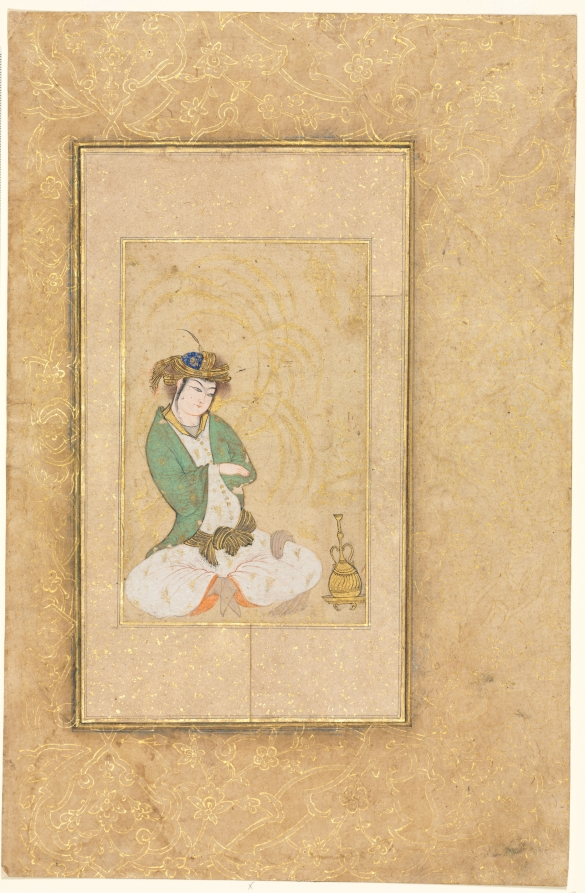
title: Youth Seated by a Willow; Single Page Illustration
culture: Iran, Isfahan, Safavid period (1501-1722)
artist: style of Muhammad Yusuf (Iranian)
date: c. 1600–1650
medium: ink, gold, and colors on paper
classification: Manuscript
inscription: Script: none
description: A new aesthetic developed under the socially and economically conscious Shah ’Abbas I (reigned 1587–1629). Single polychrome paintings of elegantly clad youth were produced in considerable number during the 1600s, primarily for people with means who collected them and had them mounted in albums. Instead of functioning as portraits, the images of these courtly figures express ideals of youth and beauty. This young man’s lavish sash and turban enriched with costly gold thread proclaim his high status.